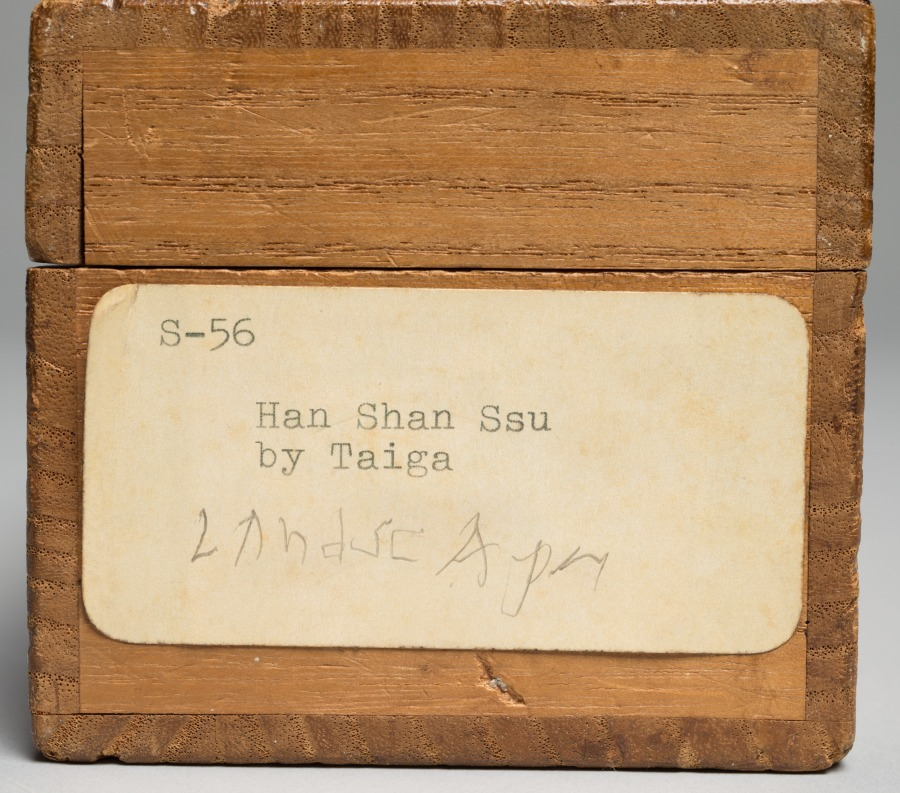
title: Illustration of Zhang Qi's Poem on the Cold Mountain Temple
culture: Japan, Edo period (1615–1868)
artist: Ike Taiga (Japanese, 1723–1776)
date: mid- to late 1700s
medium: hanging scroll; ink and color on paper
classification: Painting